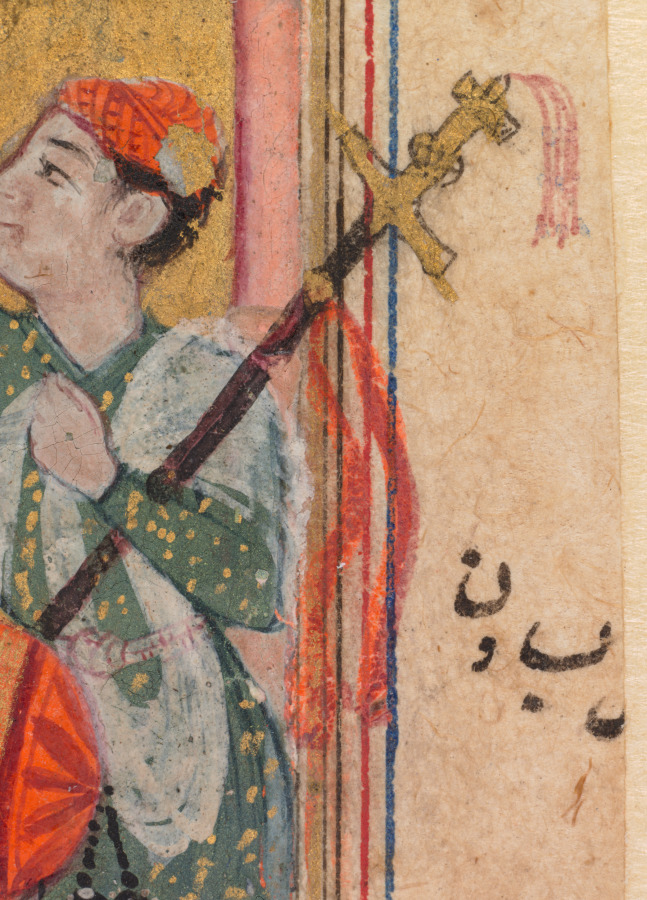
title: The hunter offers the mother parrot to the king of Kamarupa, from a Tuti-nama (Tales of a Parrot): Fifth Night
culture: Mughal India, court of Akbar (reigned 1556–1605)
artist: Basavana (Indian, active c. 1560–1600)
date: c. 1560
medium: gum tempera, ink, and gold on paper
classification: Painting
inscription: 'amal basāwan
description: The king of Kamarupa, which ironically means “body of erotic love,” had leprosy. The hunter brought the captured mother parrot to the king, assuring him that the bird knew a cure. The lavish use of gold indicates that this book was a costly production. The figure of the hunter reveals the talents of the artist Basavana, whose name is written in the right margin. Draped in rustic garments shaded to appear softly flowing, the hunter bends forward with a subtle look of shrewd expectancy as the king seems ready to pay a high price for the parrot. The billowing red curtain is one of Basavana’s signature motifs. Beyond is a tantalizing glimpse of the forest to which the parrot will soon escape to rejoin her children.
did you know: This leper king ruled a territory that stretched from Bhutan to Assam and Bengal.